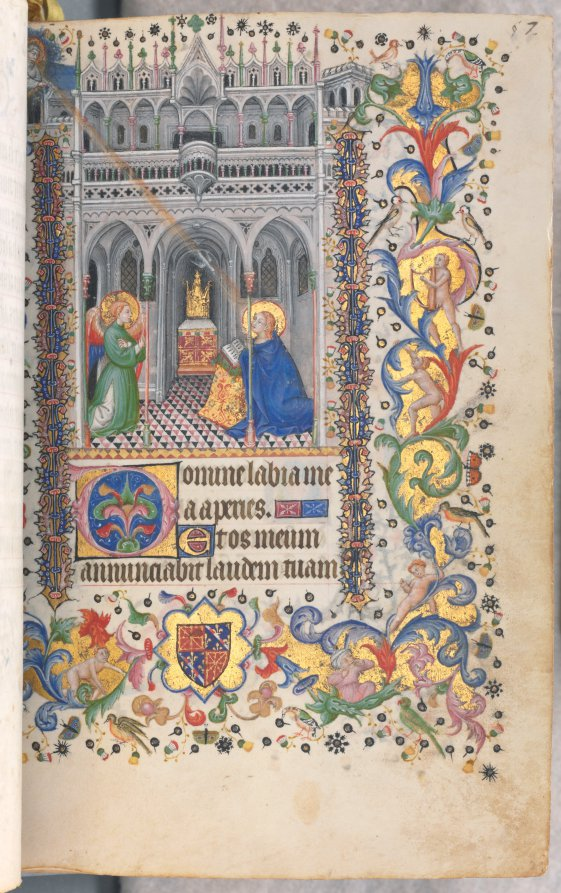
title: Hours of Charles the Noble, King of Navarre (1361-1425): fol. 29r,The Annunciation (Matins)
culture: France, Paris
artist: Master of the Brussels Initials and Associates (French)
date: c. 1405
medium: ink, tempera, and gold on vellum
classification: Bound Volume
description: This precious volume was obviously highly prized by its owner, the French-born King of Navarre, who had his coat of arms painted on no less than 20 folios. Rather than directly commissioning this manuscript from a specific workshop, it seems that Charles the Noble acquired his book of hours—perhaps made for the luxury market—while on a trip to Paris in 1404–5. A collaborative effort, six painting styles are seen within the pages of this codex, those of two Italians, two Frenchmen, and two Netherlanders. The painter who was responsible for the planning and decoration of the book, and who produced 17 of the large miniatures, was a Bolognese artist known as the Master of the Brussels Initials.